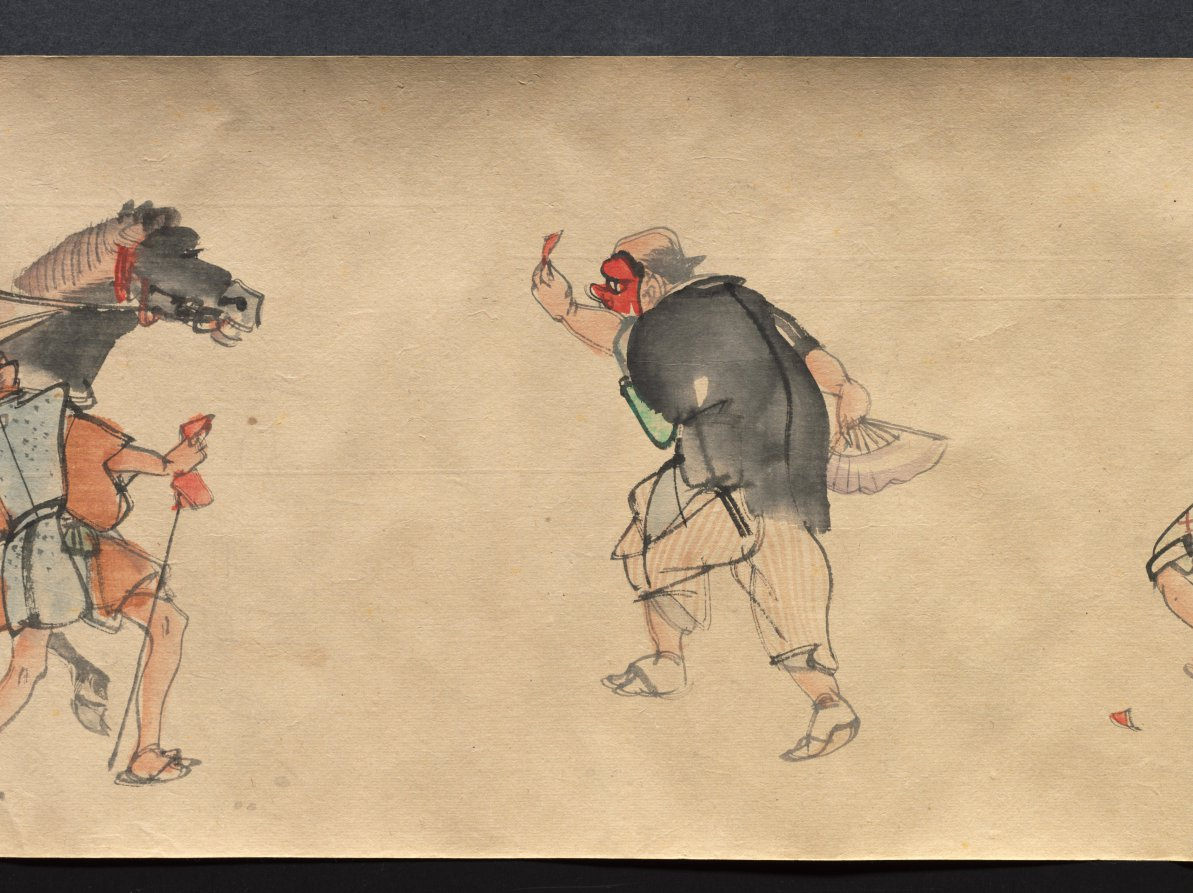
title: Festival Scenes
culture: Japan, Edo period (1615–1868)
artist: Suzuki Nanrei (Japanese, 1775–1844)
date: c. 1795–1844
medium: handscroll; ink and color on paper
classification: Painting